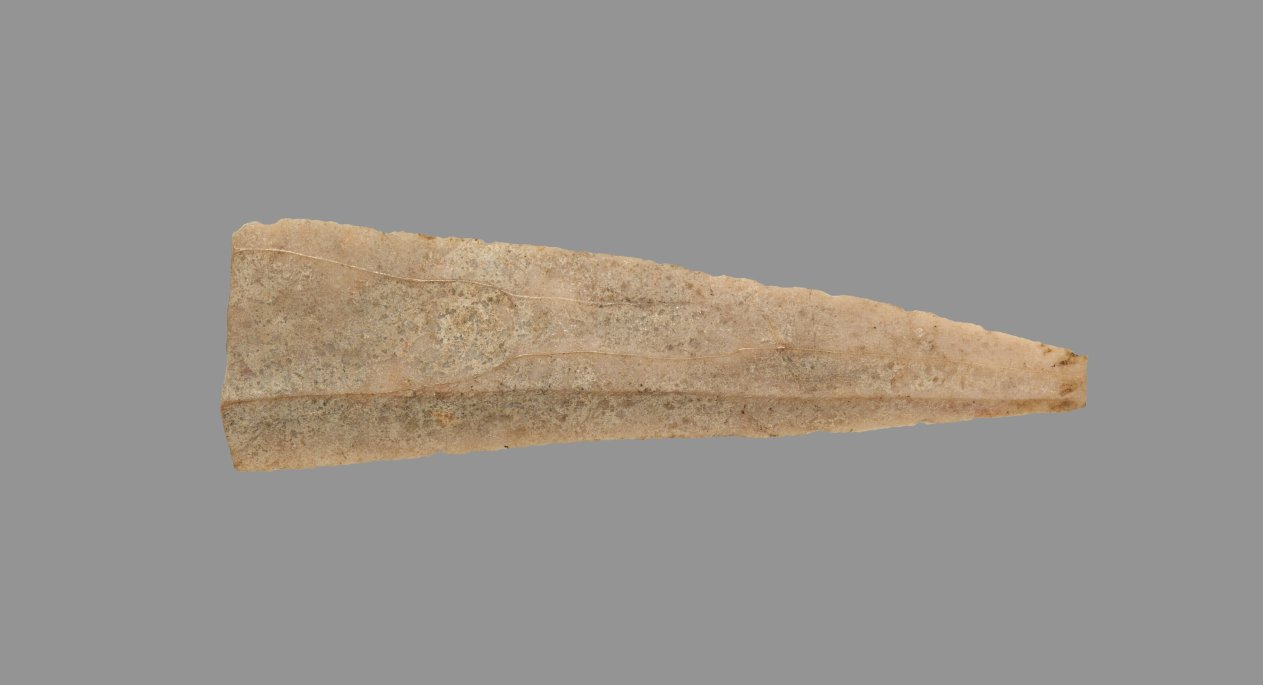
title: Sickle Blade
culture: Egypt, Middle Kingdom (2040–1648 BCE), Dynasty 12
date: 1980–1801 BCE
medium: flint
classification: Implements